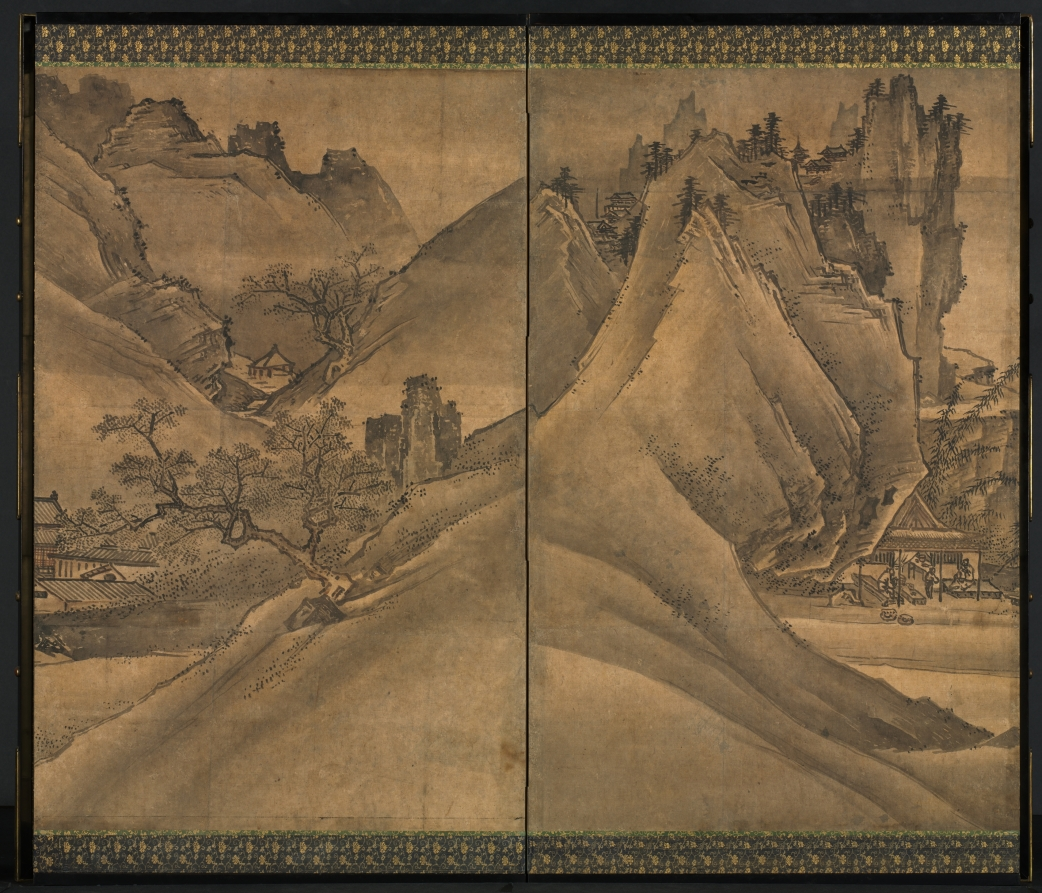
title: Landscape of the Four Seasons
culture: Korea, Joseon period (1392–1910) or Japan, Muromachi period (1392–1573)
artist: Yi Sumun (Korean, b. c. 1404)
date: late 1400s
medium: One of a pair of six-panel screens; ink and slight color on paper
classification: Painting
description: Yi Sumun is believed to have been a Korean painter who migrated to Japan in 1424 at the age of 20. This pair of screens is the artist’s most important composition in this format. Viewed from right to left, the screens show the passage of the four seasons, a popular theme in medieval Japanese ink painting.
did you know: Yi Sumun is believed to have been a 15th-century Korean man who moved to Japan at age 20 and became an influential landscape painter in Japan.